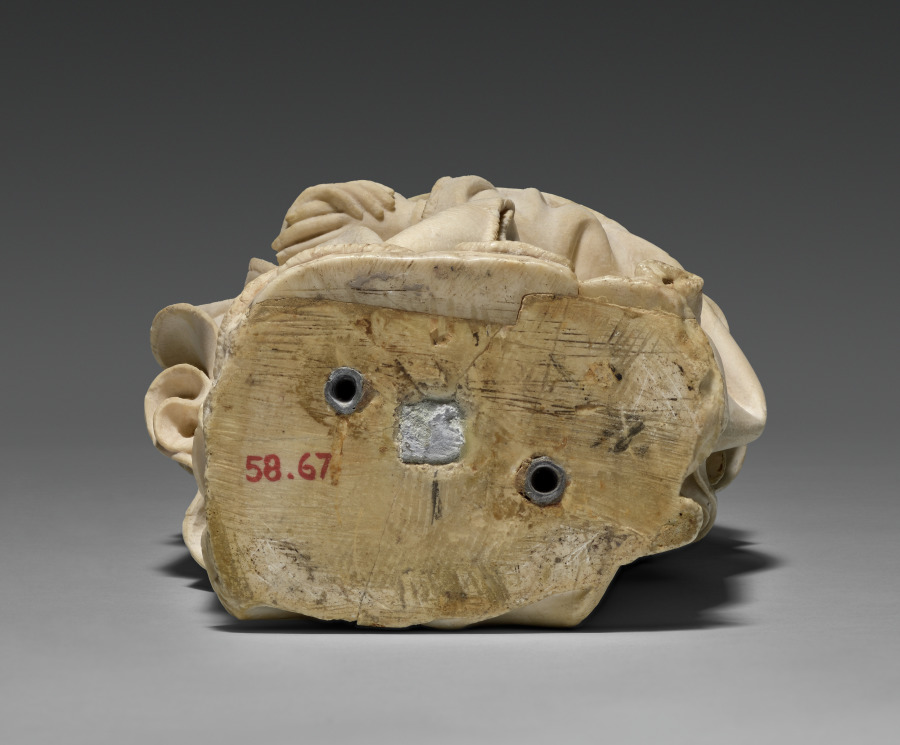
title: Mourner from the Tomb of Philip the Bold, Duke of Burgundy (1364–1404)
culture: Netherlands, active Dijon, 15th century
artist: Claus de Werve (Netherlandish, 1380–1439)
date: 1404–10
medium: vizille alabaster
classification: Sculpture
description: This figure comes from the tomb of Duke Philip the Bold from the church of Champmol near Dijon (Burgundy, France). Philip, who founded the monastery and designated it as his burial place, hired the best artists, many of whom came from the Netherlands. While the commission was given in 1381, the work was not completed until 1410, six years after the duke’s death. This mourner is unusual for the time because it is not carved as a static low relief on the pedestal of the tomb but interact with the viewers and their fellow procession members. The lifelike quality of the figure is due in large part to the alabaster. Its softness allowed artists to carve details into the material, and the transparent, milky white stone could also be polished to a high gloss.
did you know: The use of alabaster in the late Middle Ages began in the 1300s with court art in the circles of French kings, especially in the field of funerary sculpture.